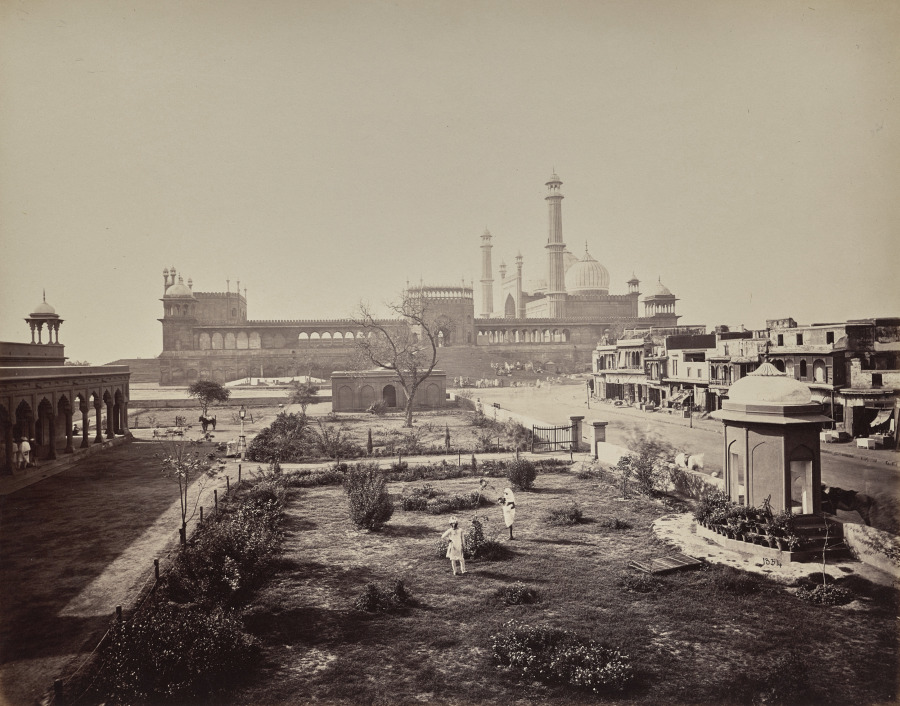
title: Delhi. View of North Side of the Jamma Musjid in Principal Mabonedau Place of Worship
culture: England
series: Photographs of Northern India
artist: Samuel Bourne (British, 1834–1912)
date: 1863–70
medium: albumen print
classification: Photograph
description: The 50 images in this album, all taken in the 1860s, move from the hill towns of the Himalayas down to cities including Lahore (now in Pakistan), Delhi, Lucknow, Agra, Benares (now Varansi), and Calcutta (now Kolkata). Architectural studies of major monuments offer valuable historical records of what sites such as the Taj Mahal and the imperial mosque of the Mughal emperors in Delhi looked like before twentieth-century restorations.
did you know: Samuel Bourne, the author of most the images in this album, was a banker in England before he moved to India to become a professional photographer.